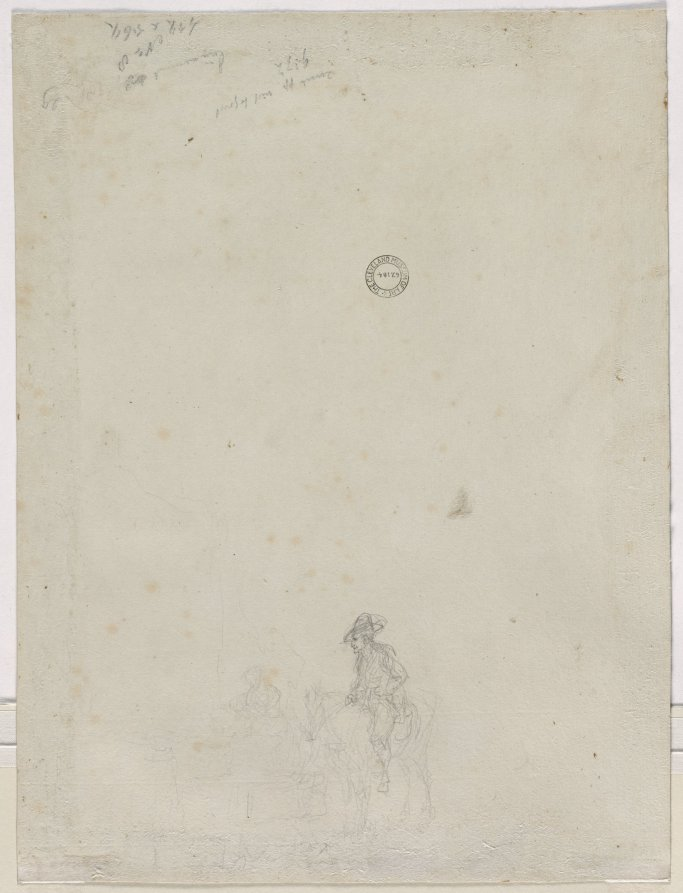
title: Sketch of Peasants at a Fountain (verso)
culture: Netherlands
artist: Dirk Langendijk (Dutch, 1748–1805)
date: 1784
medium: graphite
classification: Drawing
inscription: upper left, in black chalk?: Nº 8 / 45 1/2 x 56 1/2 [all upside down] ; upper left, in black chalk?: binnenmaat [?, =interior dimension] 38 [crossed out] 38 1/2 x 29 [partially erased, all upside down] ; upper left, in graphite: Zwart [?, =black] pp [abbrv.-passe partout=overmat] niet te groot [=not too large] / 9:7 1/2 [all upside down]